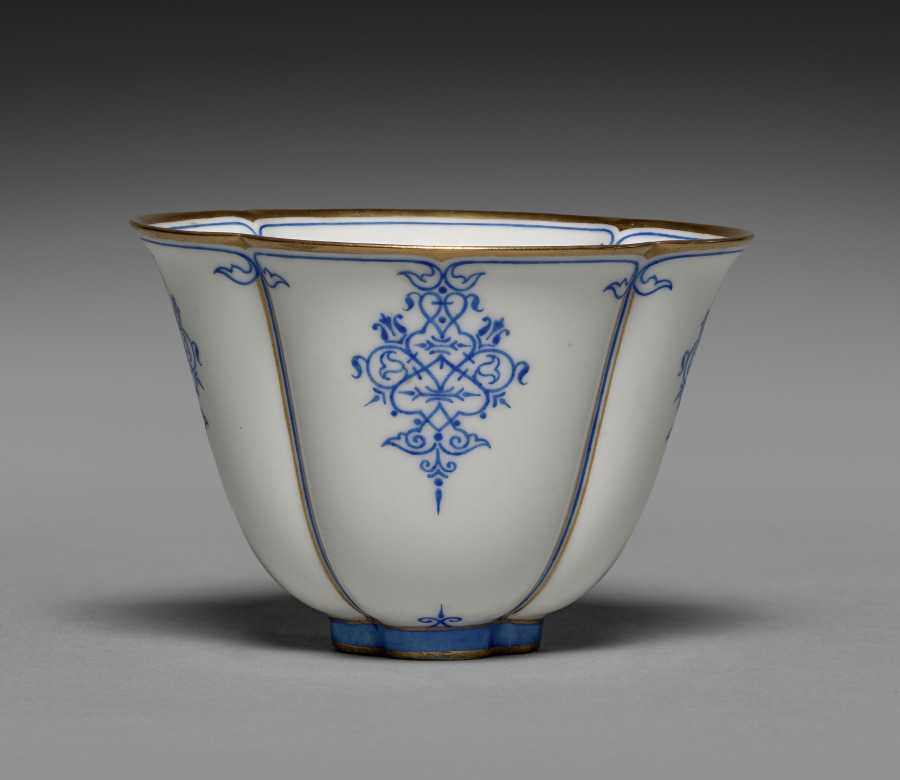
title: Cup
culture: France, Sèvres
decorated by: Guyonnet (French)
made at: Sèvres Porcelain Factory (French, est. 1756)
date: c. 1848–55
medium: hard-paste porcelain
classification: Ceramic